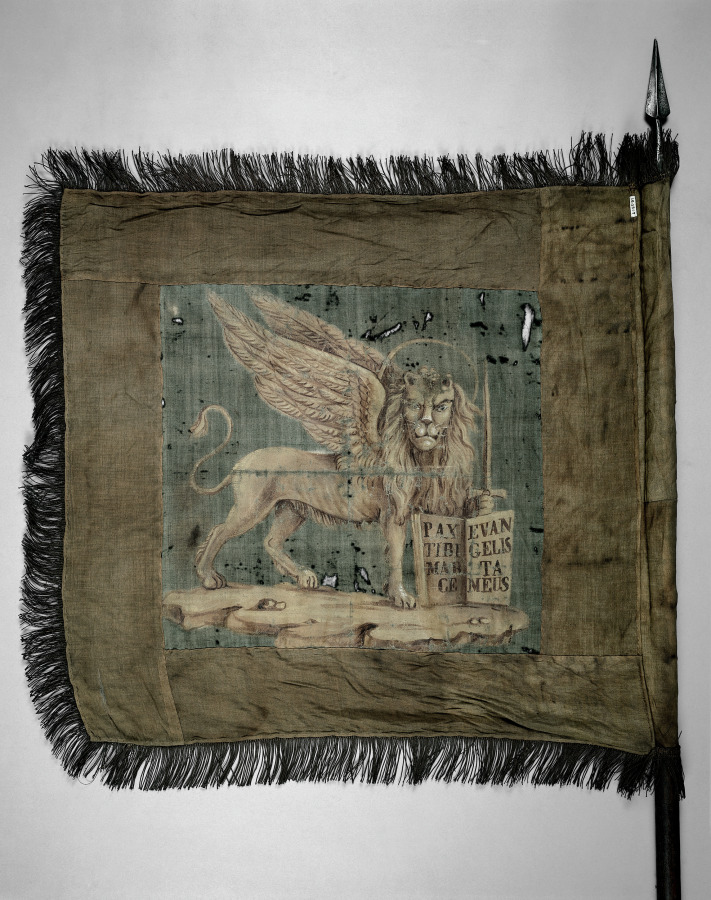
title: Banner With the Lion of St. Mark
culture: Italy, Venice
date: late 1600s - early 1700s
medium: brown silk with fringe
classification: Textile